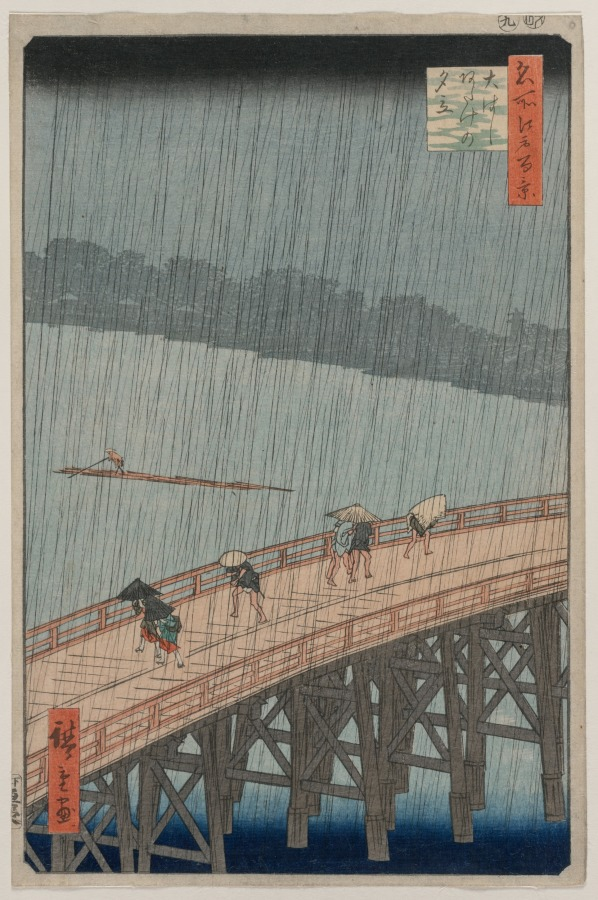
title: Sudden Shower over Shin-Ōhashi Bridge and Atake, from the series One Hundred Famous Views of Edo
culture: Japan, Edo period (1615–1868)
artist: Utagawa Hiroshige (Japanese, 1797–1858)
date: 1857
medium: Color woodblock print, ink and color on paper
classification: Print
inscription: Signature: Hiroshige Hitsu Artist Seal: Hiro Publisher: Tsujiyasu (Tsujian) Censorship Seal: Mera, Watanabe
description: Running through Edo, the Ohashi Bridge was one of 300 bridges that crossed the Sumida River. Published about a year before Hiroshige’s death, this print design illustrates the artist’s mastery of capturing atmospheric conditions. Figures scurry across the bridge amid slanting sheets of rain.